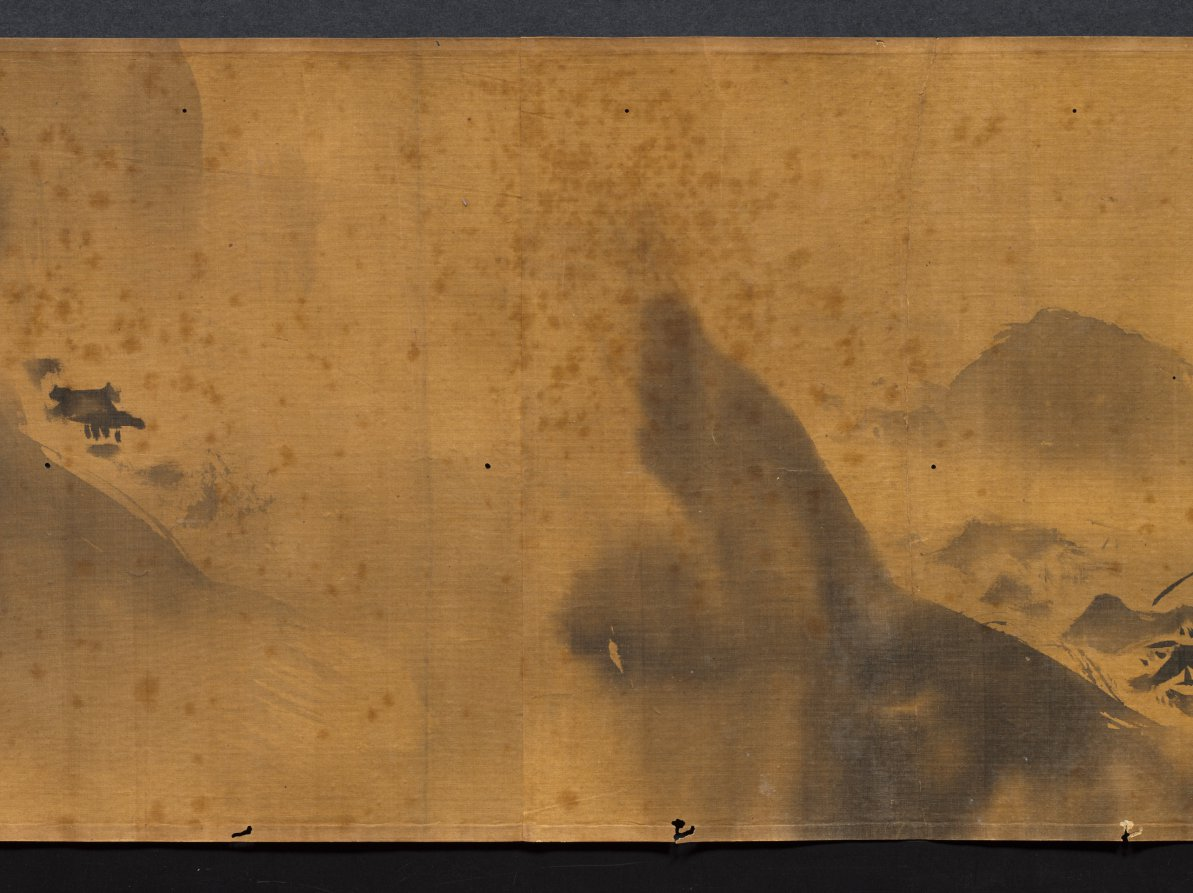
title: Eight Views of Xiao-Xiang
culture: Japan, Edo period (1615–1868)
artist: Kano Tan’yū (Japanese, 1602–1674)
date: 1615–1868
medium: handscroll; ink on silk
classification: Painting